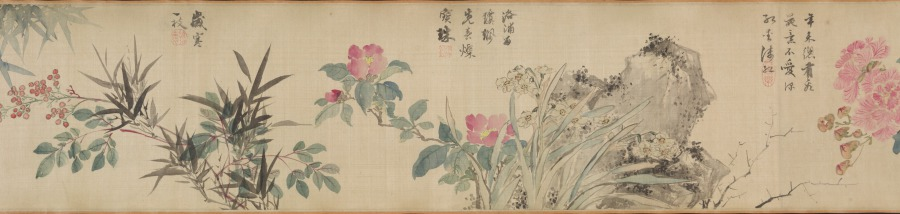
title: Flowers of Four Seasons, with Poems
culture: China, Ming dynasty (1368–1644)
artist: Wang Guxiang (Chinese, 1501–1568)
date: 1531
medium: handscroll; ink and light color on silk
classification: Painting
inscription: Artist's inscription, signature, and 15 seals. Ink Orchids. Sewn as pendants for the man of worth, swaying quiety, fragrance in the valley. [seal] Hsiao-chu ts'un Peony. Wiping his face, the young gentleman Ho [Ho Yen of Wei, Three Kingdoms] appears to have been powdered. His previous life was the perfume-stealing Han Shou [of Chin, 265–419 CE], the fragrance still lingers. [seal] Ts'un-wu chai. Flowering Crab Apple, New Bamboo. Shao-lin [Du Fu, 712–770] had to put down his brush. [Flowering Crab Apple]. Yü-k'o [Wen T'ung, d. 1079) in vain wrote poems about [Bamboo]. [seal] Yu-shih. Lotus Flowers. When she turns her head, half-hidden by a fan, and casts a glance, all the beautiful women become colorless. [seal] K'ang yüeh huai. Loquat. Ripeness in summer. [seal] Lu-chih. Pomegranate Flower. Whenever I remember you I will send my thoughts, but where have you gone--the [skirt] of pomegranate red? [seal] Wu-ho Sheng. Day Lily. Plant the day lily to forget sorrow. [seal] Yu-shih. Chrysanthemum. The untrammelled joy at the eastern fence. [seal] Lu-chih. Begonia. Comparing it to the beauties of Spring, and spreading them out as trimming for the stone steps. [seal] Yu-shih. Hibiscus. In recent years I have always enjoyed looking at flowers; instead of dark red I preferred pink ones. [seal] Jen-sheng i-lou. Narcissus, Camellia. The jade girdle left behind at Lo River. [Narcissus]. The precious pearls glitter before Spring. [Camellia]. [seal] Lu-chih. Heavenly Bamboo (Nandina domestica). A single branch in the wintry season. [seal] K'ang yüeh huai. Plum. Fragrant snow in the Lo-fou Mountains. [seal] Ts'un-wu chai. In the eleventh lunar month of the hsin-mao year of the Jiaqing era [1531], [I] imitated the boneless style of Yüan masters in sketching from life. Guxiang [seals] Yu-shih; Lu-chih. Translated by Wai-kam Ho/Lingyun Shih Liu (1980)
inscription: 2 colophons and 23 additional seals: 1 colophon dated 1632, and 2 seals of Li Jih-hua [Li Rihua] 李日華 (1565–1635); 1 colophon and 2 seals of Xiang Shengmo 項聖謨 (1597–1658); 3 seals of Liang Qingbiao 梁清標 (1620–1691); 6 seals of the Jiaqing 嘉慶 emperor (r. 1796–1820); 9 seals of Ch'eng Ch'i [Cheng Qi] 程琦 (1911–1988)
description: In this painting, flowers are loosely arranged by the seasons: narcissus and peony represent early spring; yellow loquat and lotus, summer; chrysanthemum, autumn; and the plum and evergreen bamboo, winter. The artist added to each flower a poetic line of calligraphy associating each plant with a historic or legendary figure. For example, the chrysanthemum, along with the line “The untrammeled joy at the eastern fence,” refers to the poet Tao Yuanming (died AD 427) who enjoyed chrysanthemums at the eastern fence in his garden. The scroll illustrates Wang Guxiang’s mastery of free brushwork, combining light monochrome ink with transparent colors. In his inscription, Wang says he used the “boneless” style without outlines as developed during the Yuan dynasty (1279–1368). Wang was a native of Changzhou, a city in southeast China known for its rich flora and fauna, and flower-and-bird painting tradition.